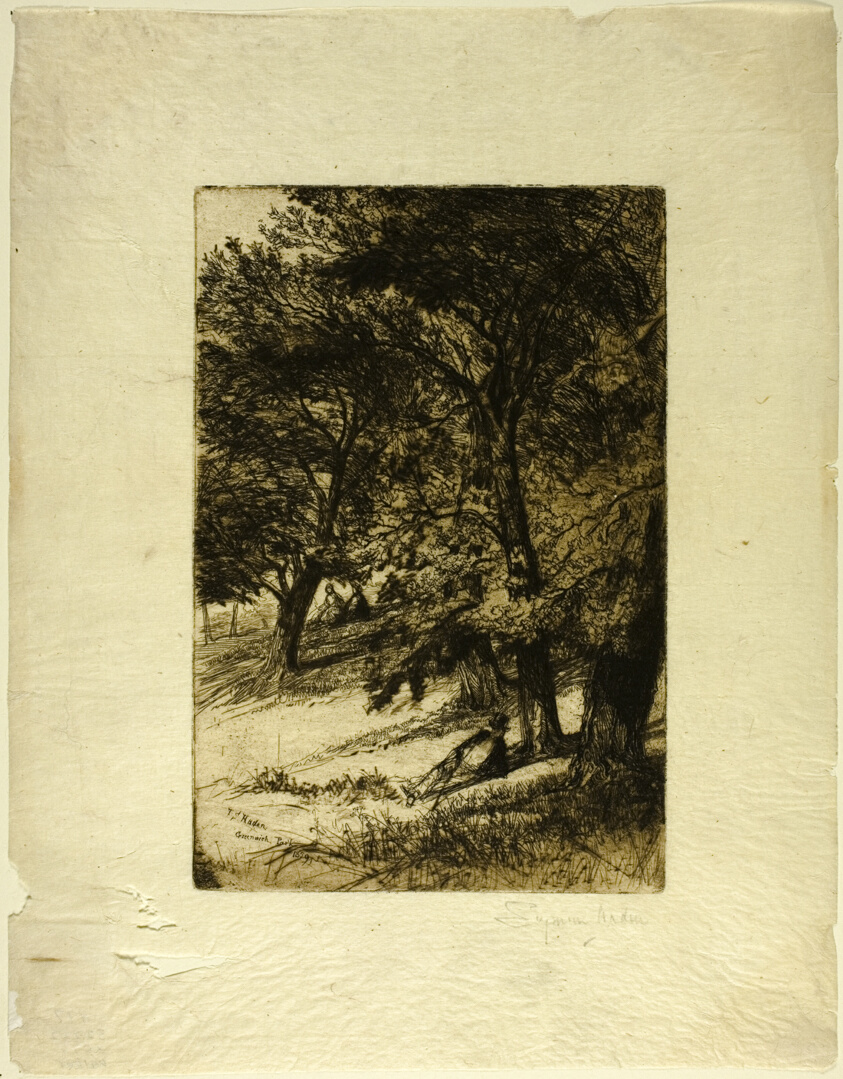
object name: Print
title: Sub Tegmine...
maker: Francis Seymour Haden (English, 1818-1910)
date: 1859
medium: Etching and drypoint on cream Japanese paper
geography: England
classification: etching; print; prints and drawing